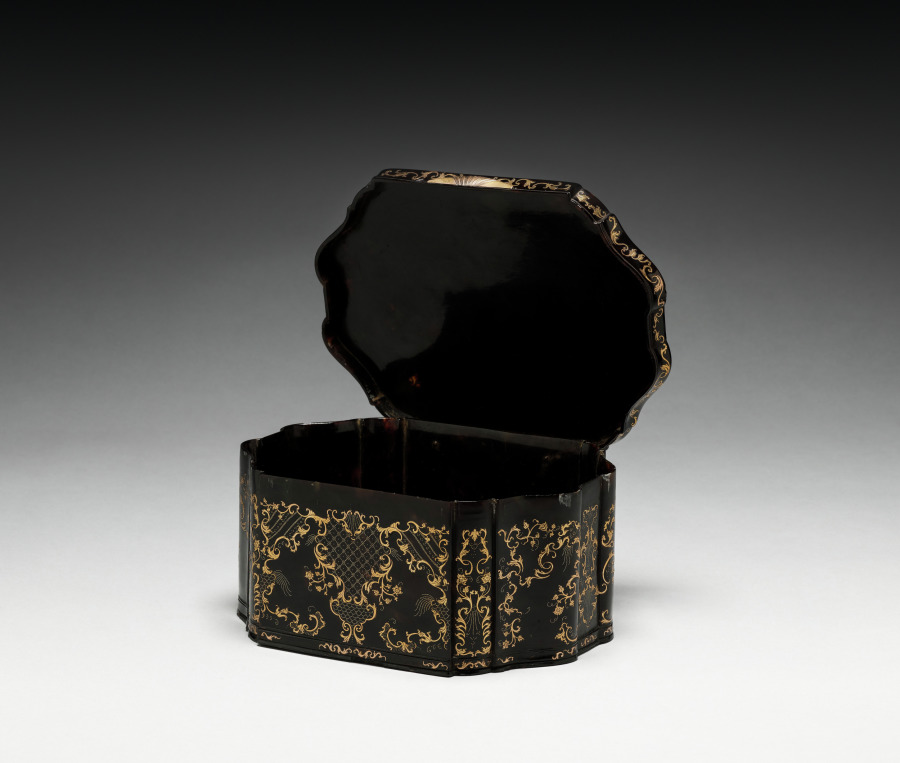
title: Box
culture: Italy, Naples (?), 18th century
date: c. 1750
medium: tortoise shell and gold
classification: Miscellaneous